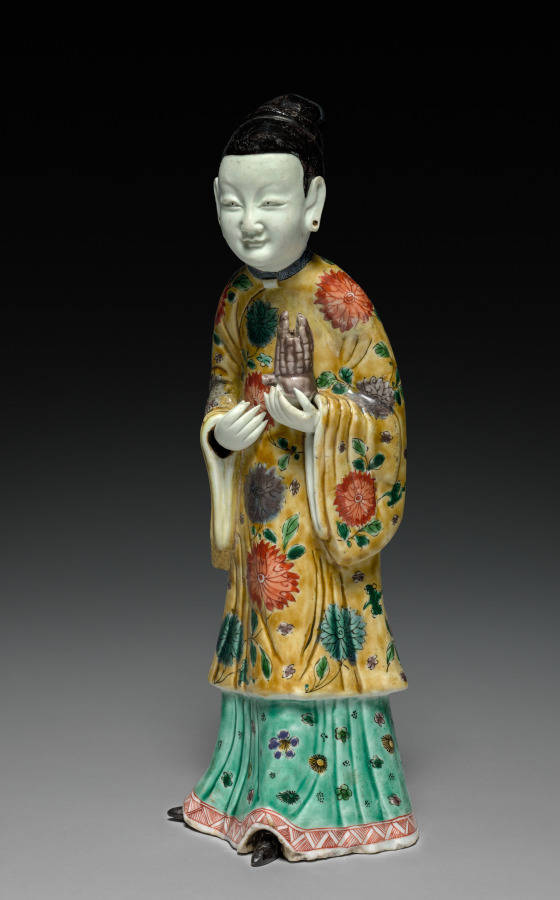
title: Court Lady Holding a Sheng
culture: China, Jiangxi province, Jingdezhen kilns, Qing dynasty (1644-1911), Kangxi reign (1662-1722)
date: 1662–1722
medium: porcelain with famille verte overglaze enamel decoration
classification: Ceramic